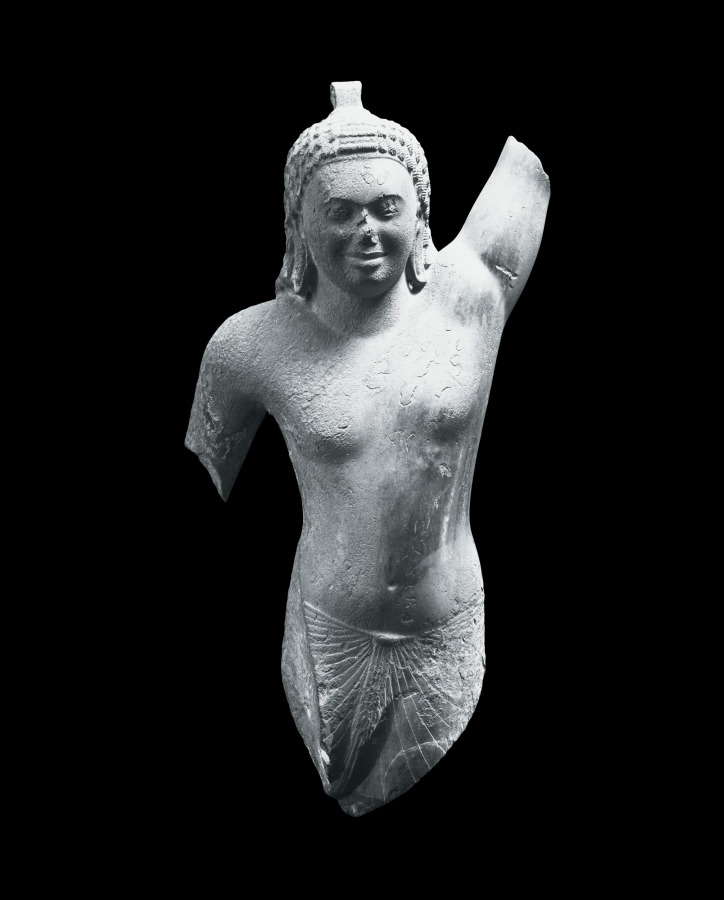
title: Krishna Lifting Mount Govardhan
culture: Southern Cambodia, Takeo Province, Phnom Da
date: c. 600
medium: Sandstone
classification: Sculpture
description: This masterwork of early Cambodian sculpture shows the Hindu god Krishna effortlessly holding aloft a mountain to protect his fellow villagers and herds from torrential storms sent by a jealous old god. It is one of eight monumental monolithic figures recovered from a two-peaked mountain in the floodplains of the Mekong River delta, on the outskirts of the ancient urban center of Angkor Borei.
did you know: Gold earrings were once fastened to the sculpture using holes in the figure's earlobes.